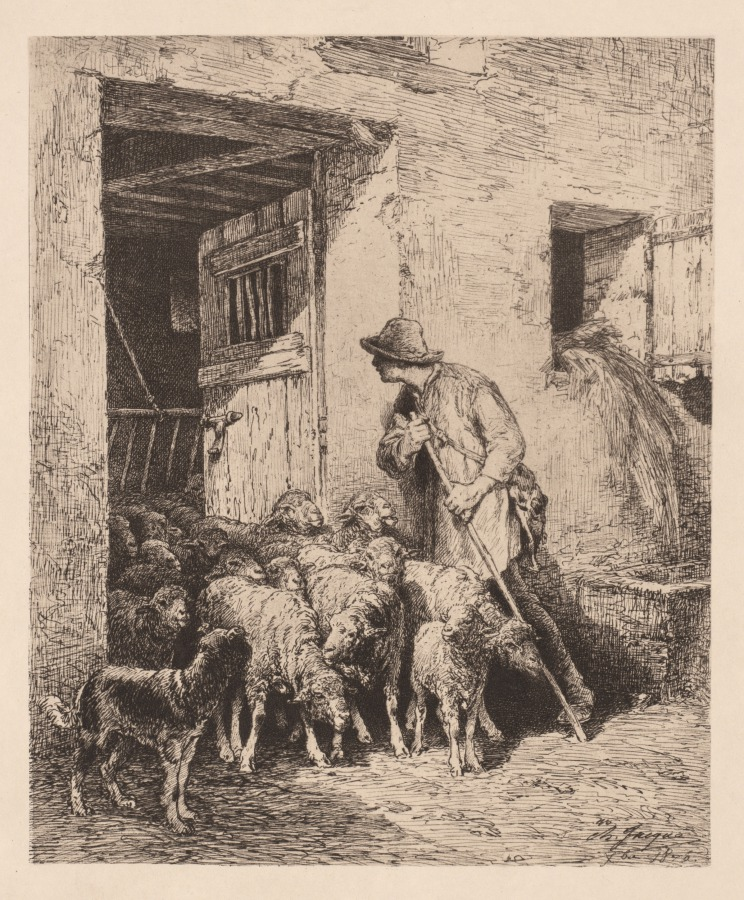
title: The Herd Exits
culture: France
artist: Charles-Émile Jacque (French, 1813–1894)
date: 1876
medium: etching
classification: Print